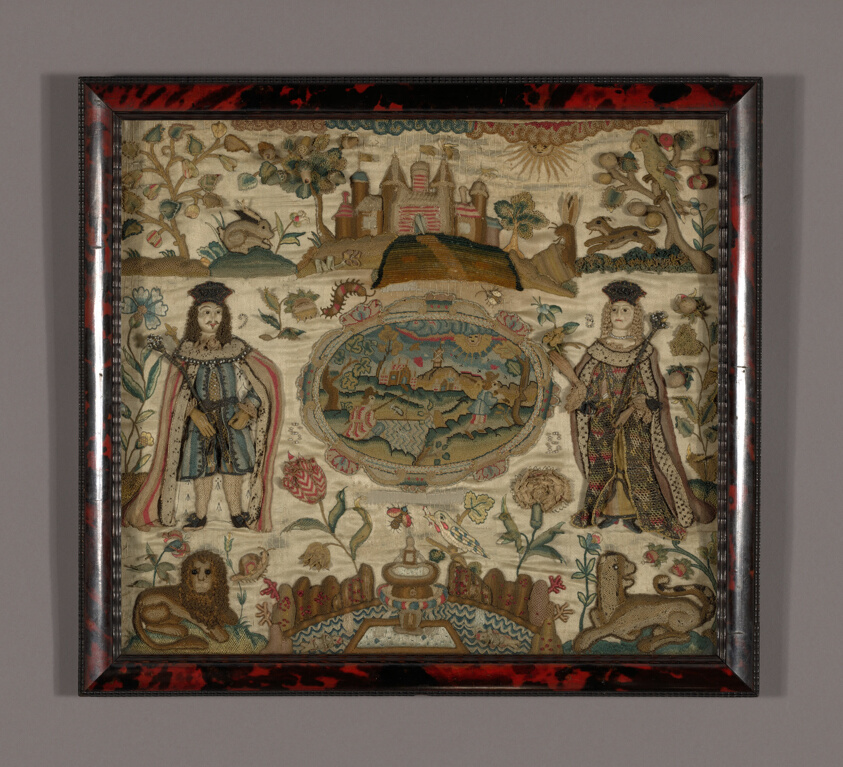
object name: Textile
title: Needlework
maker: England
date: 1698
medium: Silk, warp-float faced 4:1 satin weave; appliquéd with linen, plain weave; embroidered with silk in tent stitches and embroidered with silk, linen, gilt-metal strips, wires, purl, and gilt-metal-strip-wrapped silk in bullion, cross, satin, and stem stitches; raised work in a variety of buttonhole, raised stem, and trellis stitches with buttonhole and bullion picots; couching and embroidered cut pile; embellished with seed pearls and glass beads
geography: England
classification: textile; needlework (visual works)